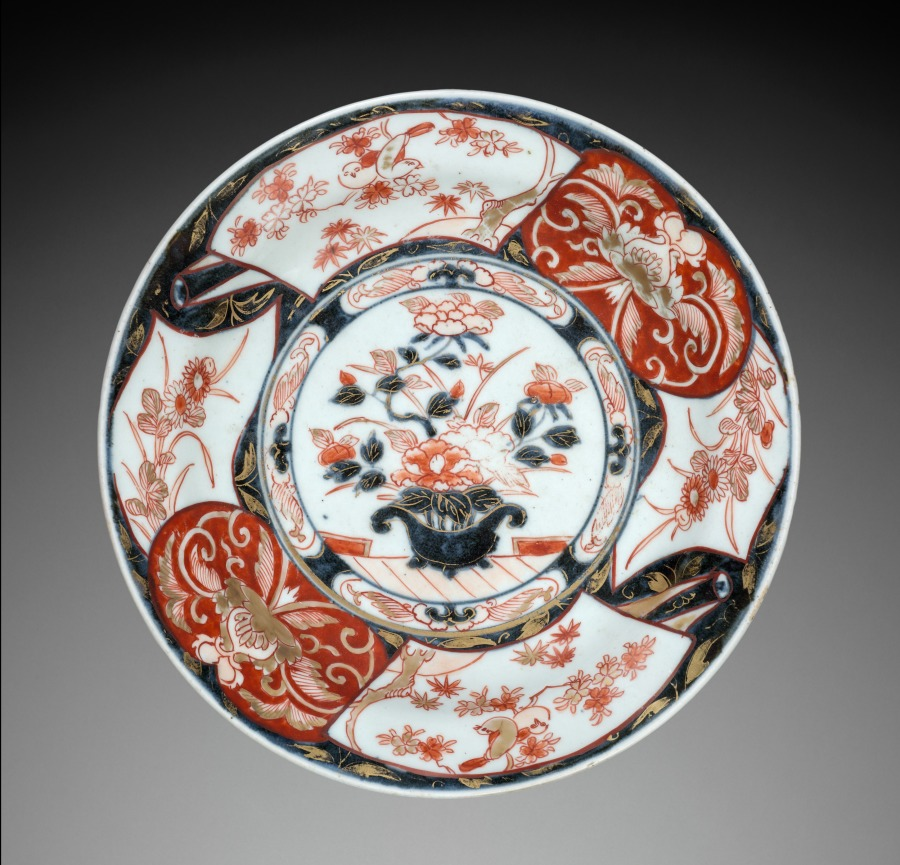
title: Plate with Vase of Peonies: Imari Ware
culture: Japan, Edo period (1615–1868)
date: c. 1700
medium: porcelain with decoration in underglaze blue overglaze, and gold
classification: Ceramic